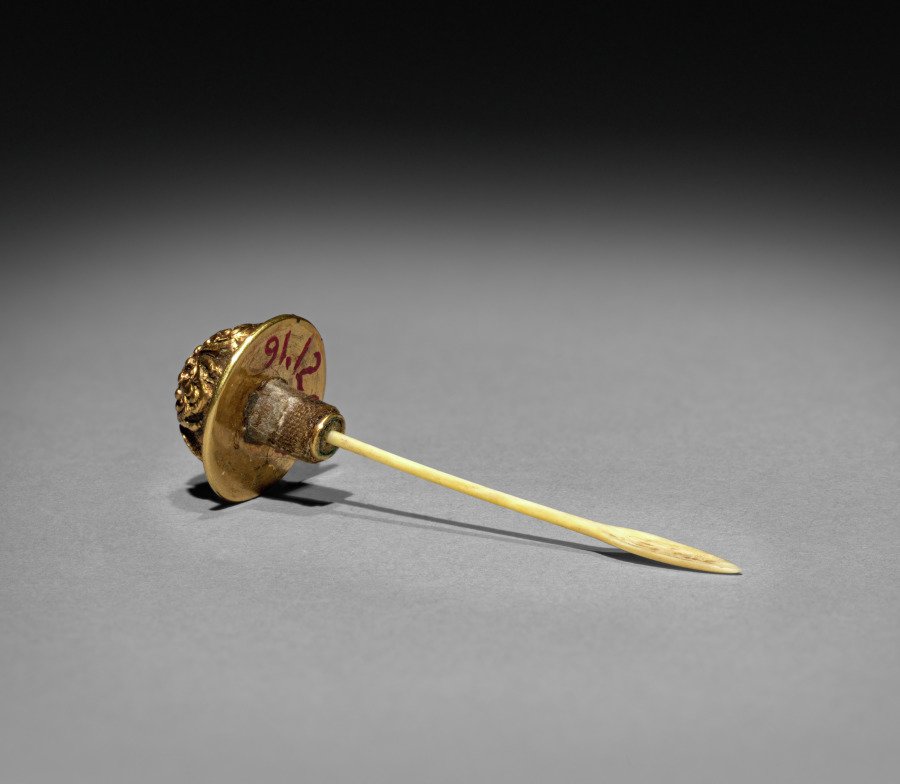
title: Snuff Bottle with European Figures (stopper)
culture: China, Qing dynasty (1644-1911), Qianlong mark and reign (1736-95)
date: 1736–95 or later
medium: painted enamel on copper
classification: Enamel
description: Snuff bottles were introduced from Europe to China around the 1700s to hold portable snuff or medicine.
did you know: The stopper is decorated with bats, which traditionally symbolize good luck, since both words (蝠 and 福) are both pronounced as fu in Chinese.